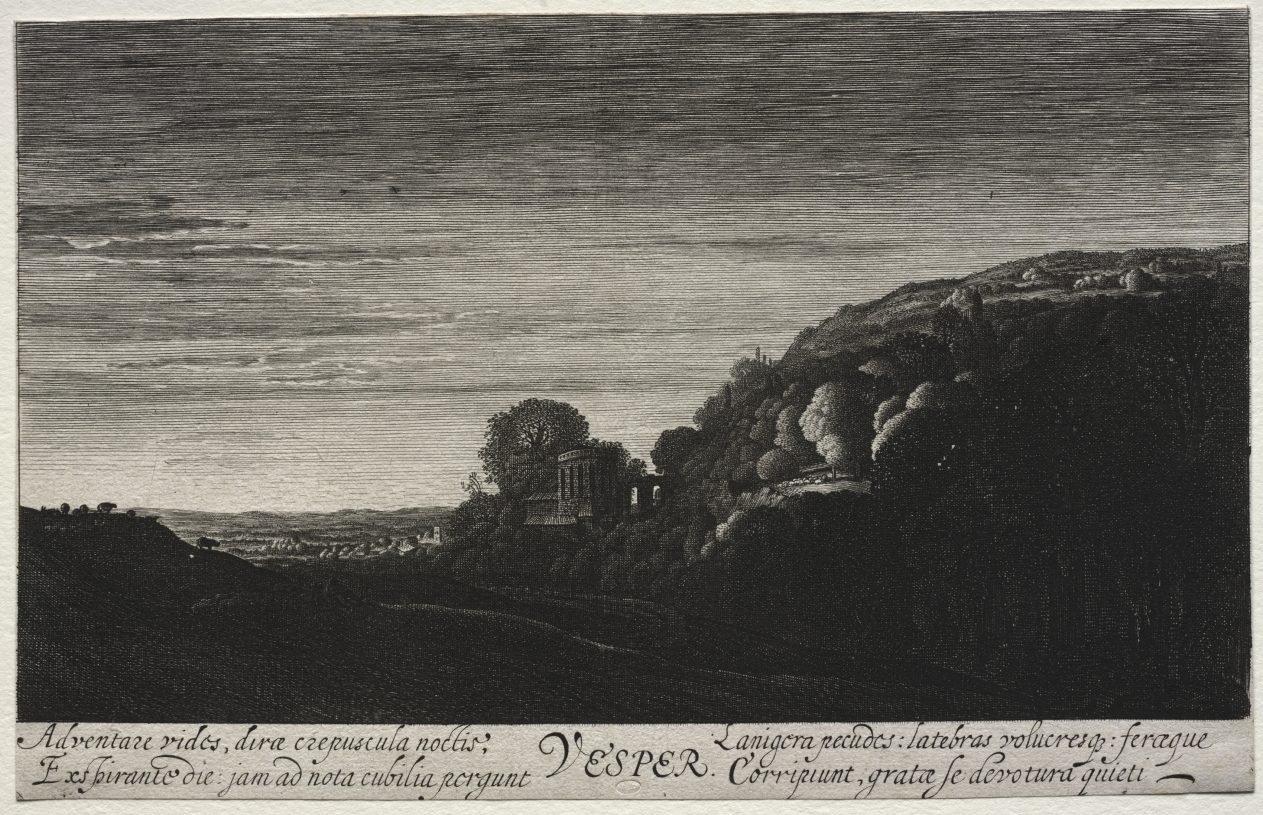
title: Times of Day: Vespers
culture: Netherlands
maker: Jan van de Velde II (Dutch, 1593–1641)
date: c. 1622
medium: engraving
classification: Print